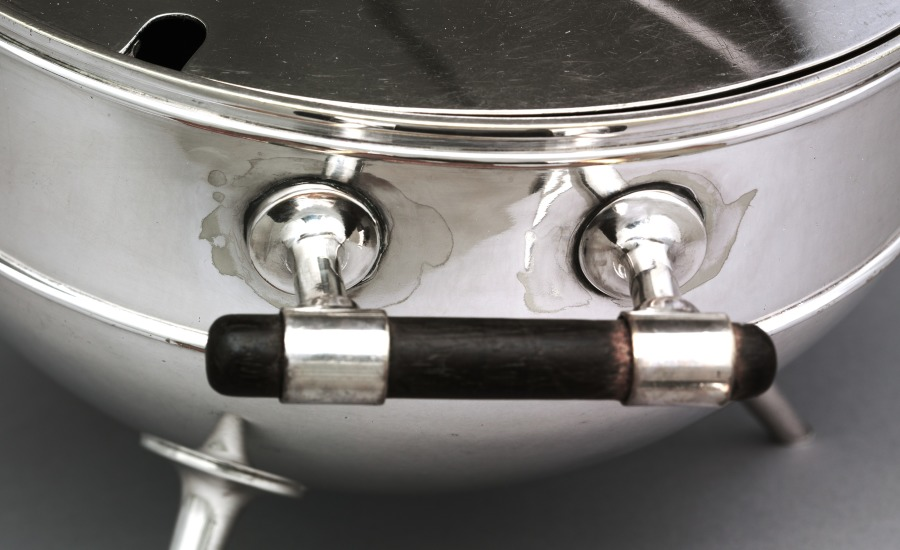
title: Covered Tureen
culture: England, 19th century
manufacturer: Hukin & Heath (British)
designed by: Christopher Dresser (British, 1834–1904)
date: c. 1880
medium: silver plated metal, ebony handles and knop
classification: Metalwork